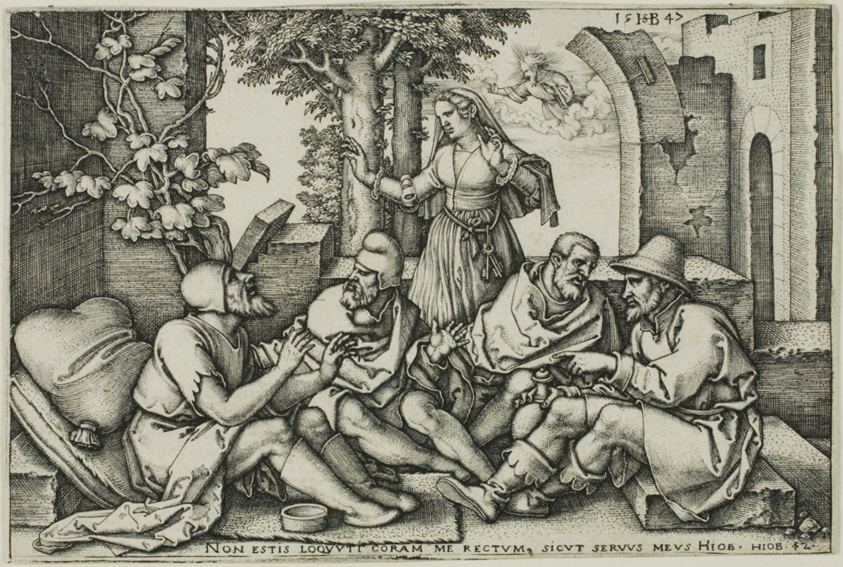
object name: Print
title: Job Conversing with His Friends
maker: Sebald Beham; German, 1500-1550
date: 1547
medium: Engraving in black on ivory laid paper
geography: Germany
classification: engraving; print; prints and drawing